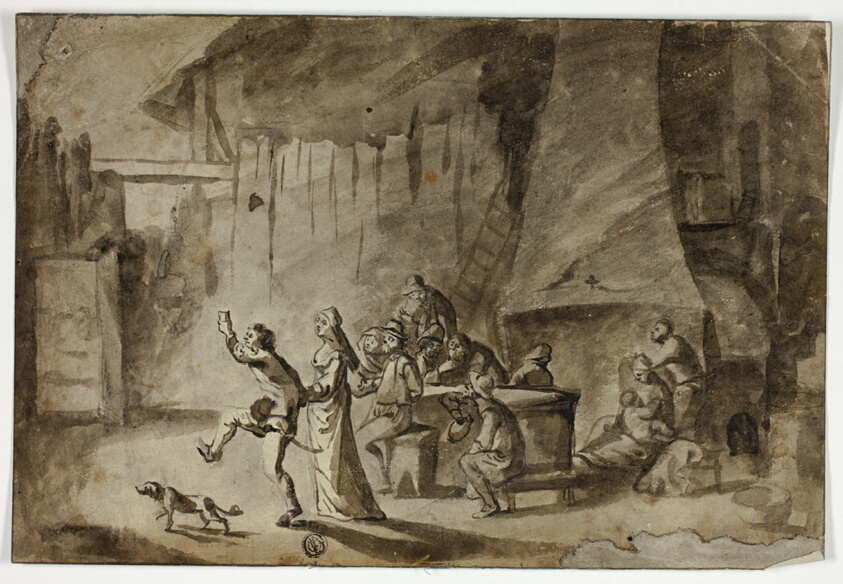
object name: Drawing and Watercolor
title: Men and Women in Tavern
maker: Unknown Artist; Dutch, 1700-1799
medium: Pen and brown ink, and brush and brown wash, with touches of graphite, on cream laid paper, laid down on grayish-ivory laid paper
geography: Holland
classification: ink or chalk wash; drawings (visual works); prints and drawing